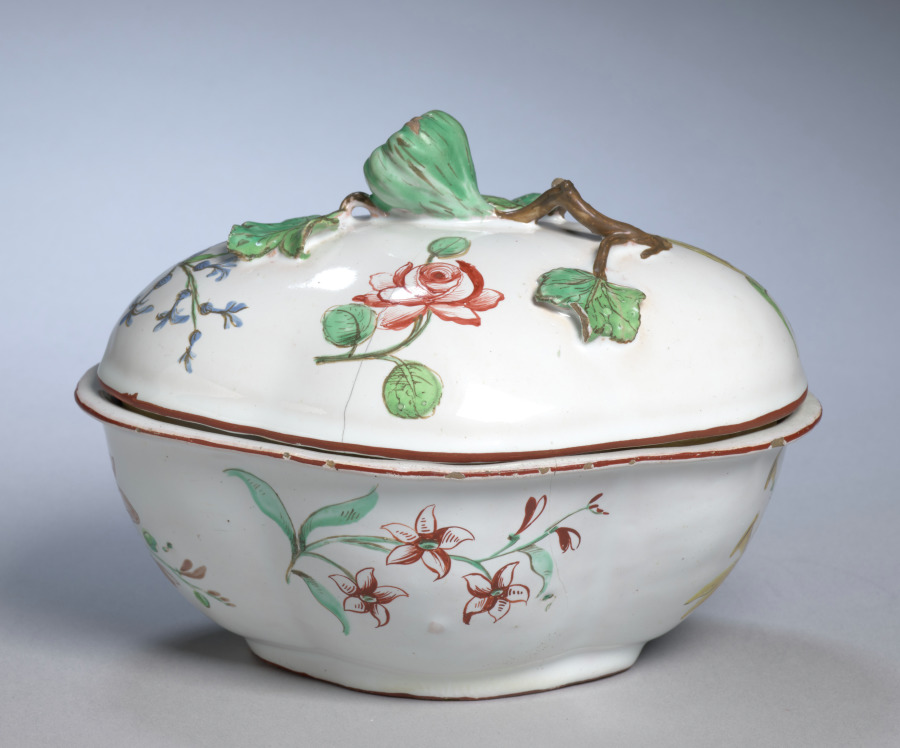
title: Sugar Basin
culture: France, 18th century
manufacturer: Sceaux Factory (French, active 1748–66)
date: c. 1750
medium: faience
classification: Ceramic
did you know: In medieval Italian churches, painted altarpieces served as a focal point for worshippers during the rituals of faith. The figures of Jesus, Mary, and eight saints are framed by a golden background that would have glistened in the flickering candlelight of the church.